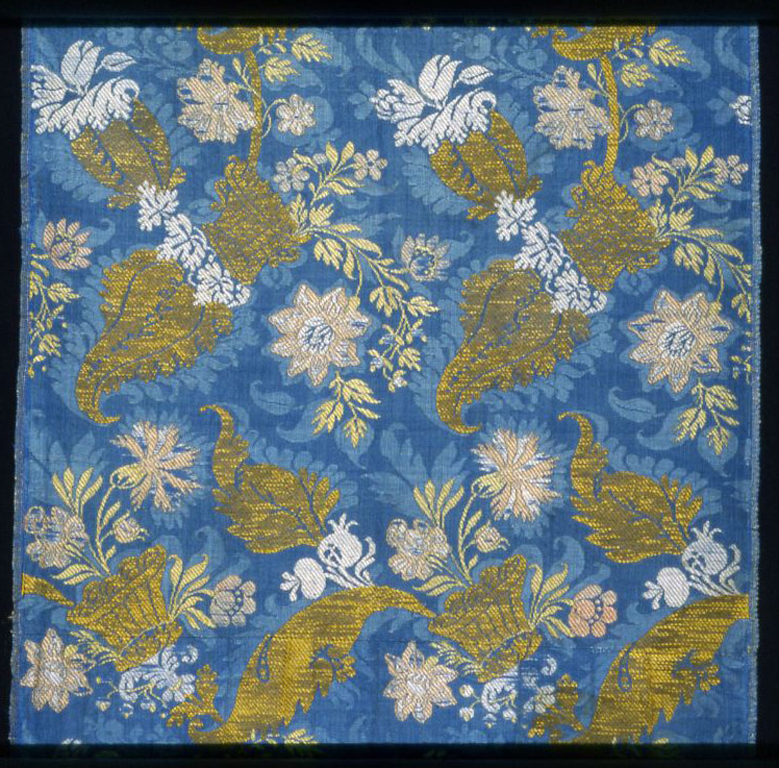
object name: Textile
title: Three Panels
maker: France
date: 1712/13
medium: Silk and gilt-metal-strip-wrapped silk, 4:1 satin weave with supplementary brocading wefts bound in 4:1 twill interlacings and self-patterned by reversing of faces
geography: France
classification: textile; weaving